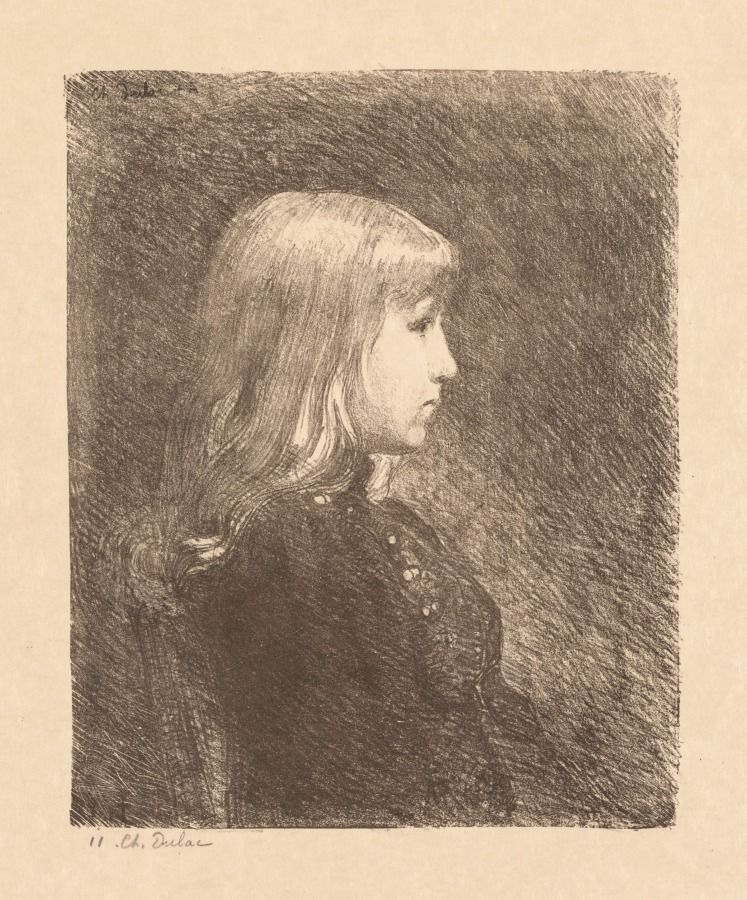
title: Young Lady (Jeune Fille)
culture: France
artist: Charles Marie Dulac (French, 1865–1898)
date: 1892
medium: Lithograph, printed in brown ink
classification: Print